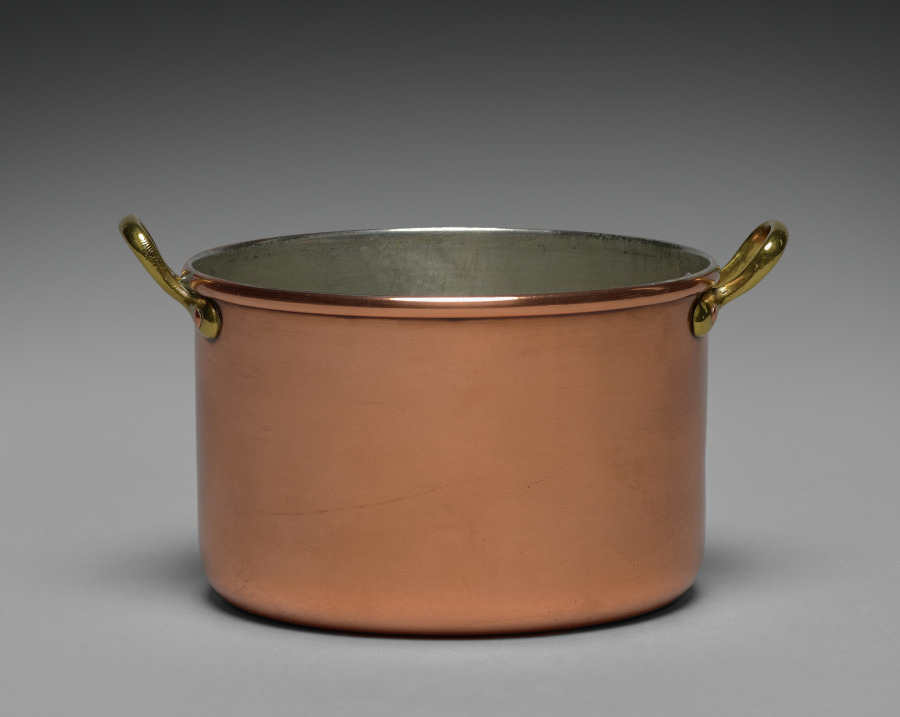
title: Pot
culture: Russia, St. Petersburg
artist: firm of Peter Carl Fabergé (Russian, 1846–1920)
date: 1914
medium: copper with brass handles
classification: Metalwork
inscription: inscribed: War (in Cyrillic), 1914r.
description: As Russia entered the First World War, austerity and economy settled into the fabric of life even among wealthy aristocrats and nobility. Not only were precious materials such as gold, silver, and gemstones hard to procure, but such luxury seemed out of place when so many men were dying at the front. Fabergé contributed to the war effort by making shells, casings, and other munitions out of brass and copper. He also made cookware, such as this small soup pot, to be sent to the front lines with provisions tucked inside. However, these simple forms only looked affordable. They were still a luxury only the wealthiest families could afford to send to their sons.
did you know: This copper soup pot was sent to the front lines filled with provisions during the First World War.